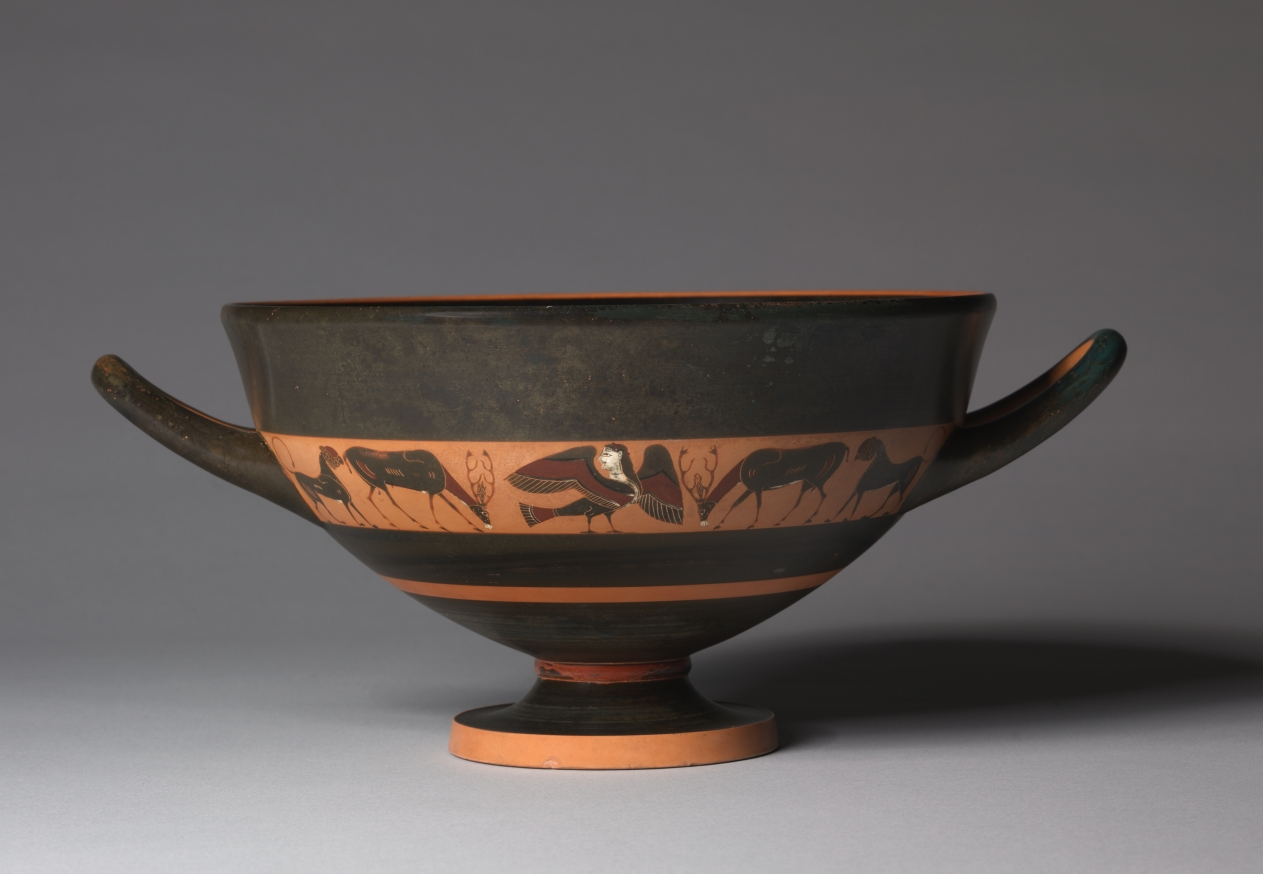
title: Black-Figure Band Skyphos (Drinking Cup): Sirens, Stags, and Panthers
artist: attributed to Group of Rhodes 11941 (Greek, Attic)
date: c. 540 BCE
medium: ceramic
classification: Ceramic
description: A siren, a mythological woman-headed bird, stands at the center of the figural band on either side of this cup, her wings spread and head turned to the left. Flanking her are a pair of grazing stags, with a panther on either side facing inward. Inside, the cup is sparsely decorated, its reserved tondo holding a dot within concentric circles.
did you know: Three of four stags on this cup each appear to have just one ear.